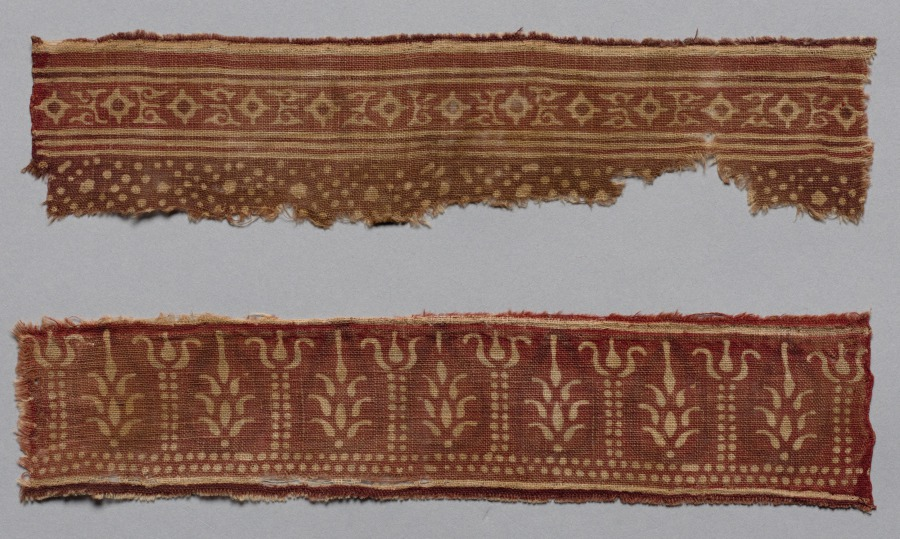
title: Fragments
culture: India, 12th-14th century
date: 1100s - 1300s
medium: plain cloth, resist dyed; cotton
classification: Textile